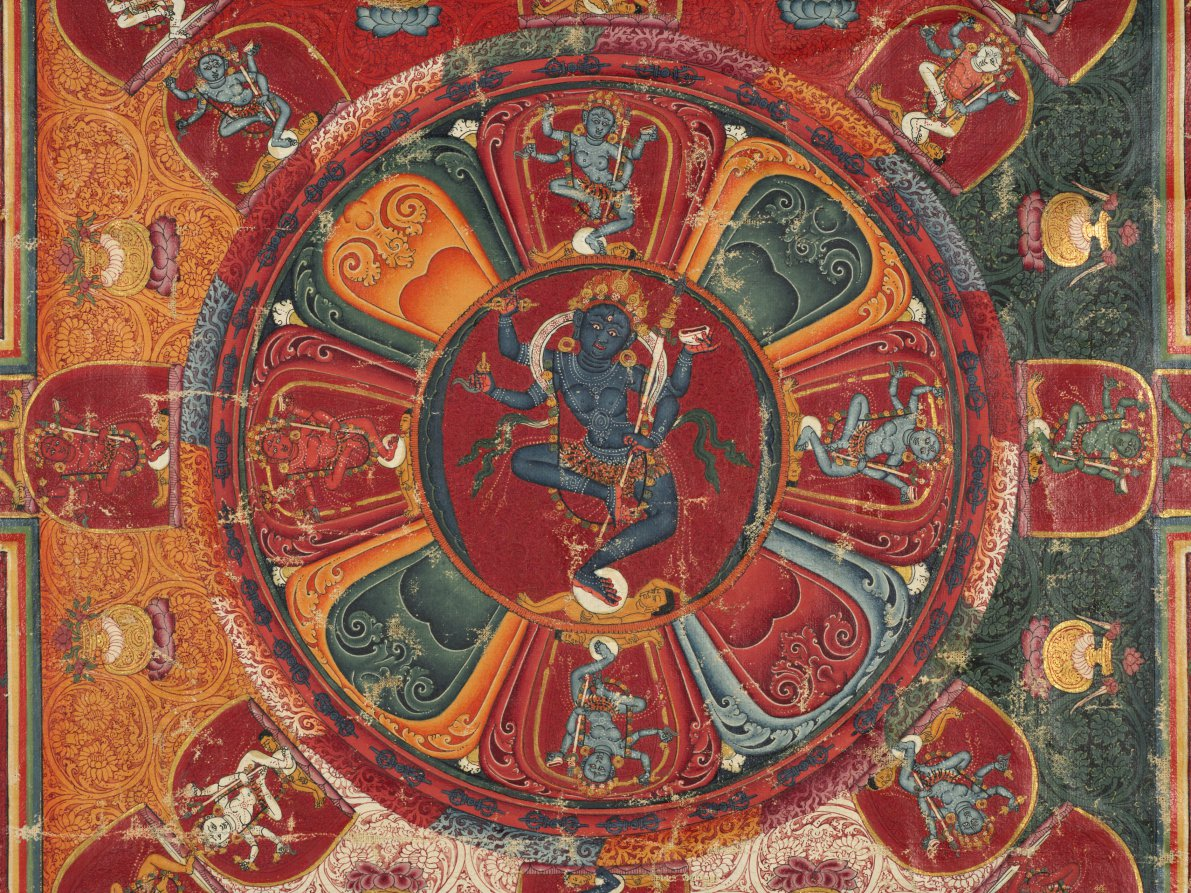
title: Twenty-three Deity Nairatma Mandala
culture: Central Tibet, Sakya-affiliated monastery, 14th century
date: c. 1375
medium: Gum tempera, ink, and gold on cloth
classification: Painting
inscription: The inscription along the bottom says: Twenty-three deity Nairatma Mandala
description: One of the main types of imagery in tantric Buddhist art is the mandala, a two-dimensional diagram of the realm of an enlightened being. This mandala depicts the palace of Nairatma, who dances in the center surrounded by her entourage. Using the painting as a guide, the tantric practitioner in meditation mentally projects the two-dimensional plan into three-dimensional space and enters into it. The outermost ring contains depictions of the cremation grounds, where corpses are being burned and consumed, as well as tantric yogis and masters who work there in order to understand the impermanence of the body, defeat their fear of death, and overcome irrational aversions to impure aspects of life. Virupa is depicted twice, always pointing to arrest the sun with his raised left hand. He sits among the row of lineage masters along the top edge, and is also depicted in the topmost segment of the ring of cremation grounds, being served a cup of liquor. Along with lineage masters at the top of this impressive painting, bodhisattvas and important masters are depicted in the spandrels, each identified by an inscription.